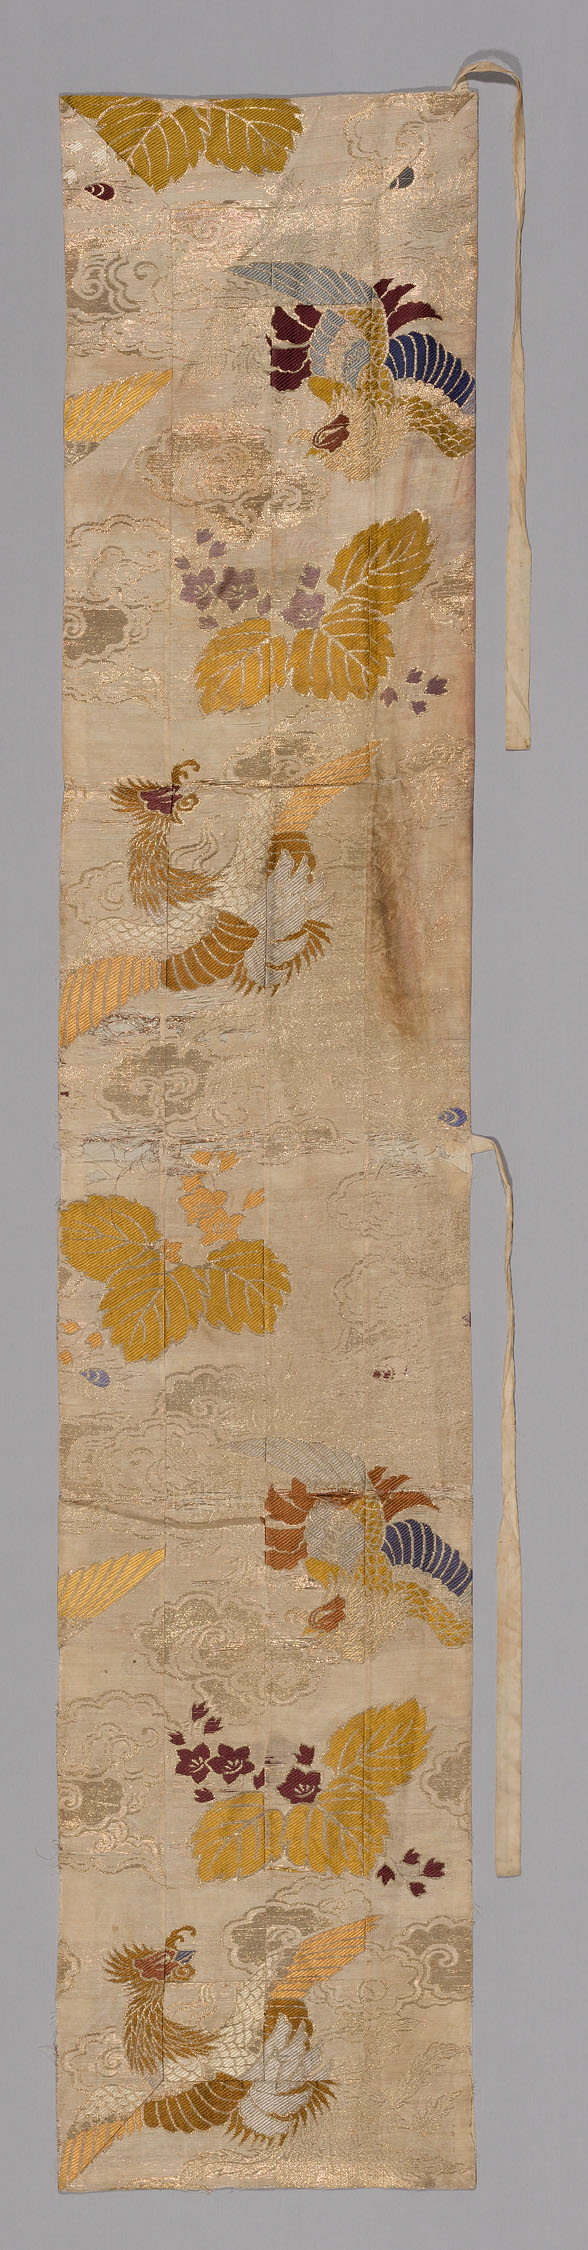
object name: Textile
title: Ôhi (Stole)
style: late edo, Japanism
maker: Japan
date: late Edo period (1789–1868), 1800/50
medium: Silk, gold-leaf-on-lacquered-paper-strip wrapped silk and gold-leaf-over-lacquered-paper-strip, plain weave with supplementary patterning wefts bound in weft-float faced 1:3 ‘Z‘ twill interlacings; lining: silk, plain weave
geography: Japan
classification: textile; liturgical - buddhist; weaving